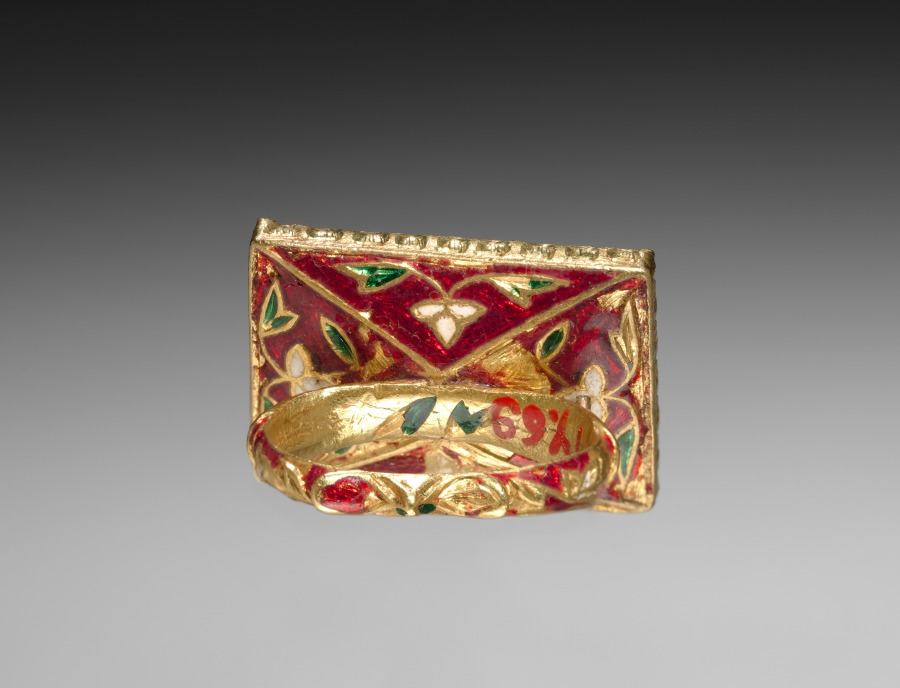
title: Ring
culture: India, Mughal, 18th century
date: 1700s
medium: Gold, colored glass, and enamel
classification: Jewelry